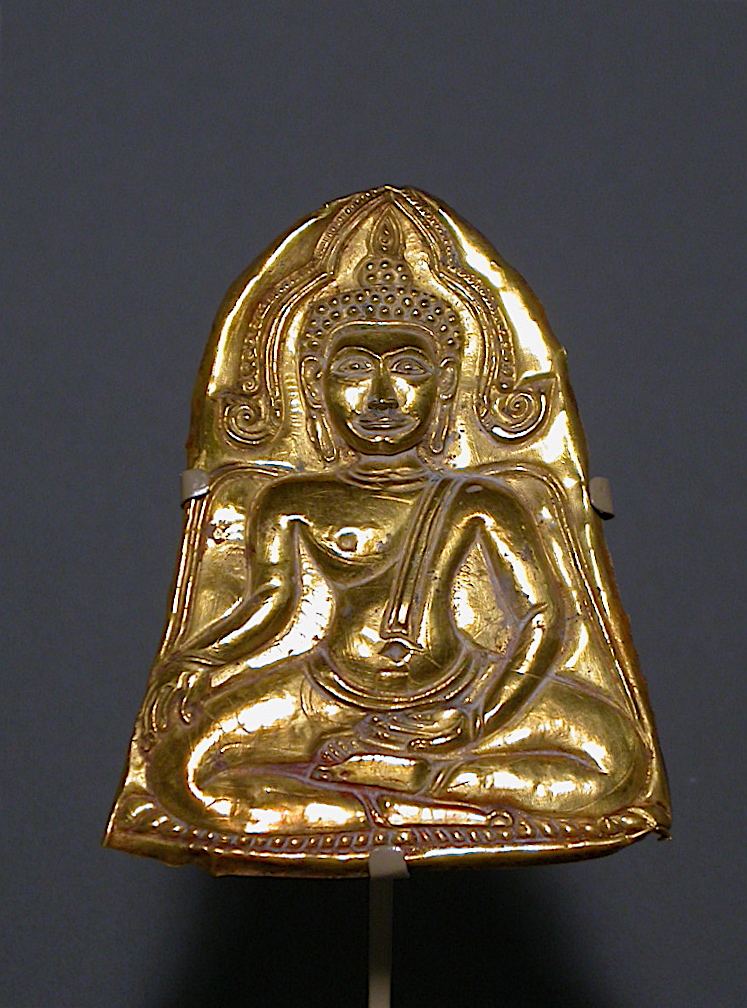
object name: Religious/Ritual Object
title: Votive Plaque with Buddha Triumphing over Mara (Maravijaya)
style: Southeast Asian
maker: Thailand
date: 19th century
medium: Gold repoussé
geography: Thailand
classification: gold; metal; sculpture; asian art; ritual objects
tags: Buddha